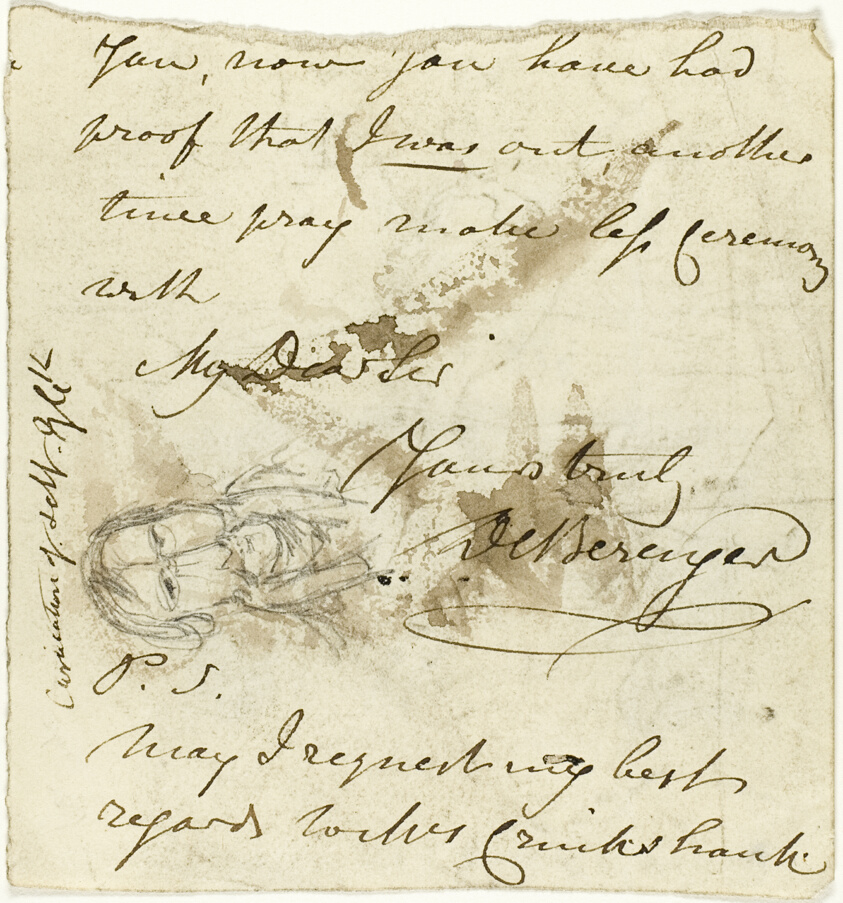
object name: Drawing and Watercolor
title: Caricature of Self (recto); Cab Thrown by a Horse, with Other Sketches (verso)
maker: George Cruikshank (English, 1792-1878)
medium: Graphite (recto), and graphite and brush and brown wash (verso), on cream wove paper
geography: England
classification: graphite; drawings (visual works); prints and drawing